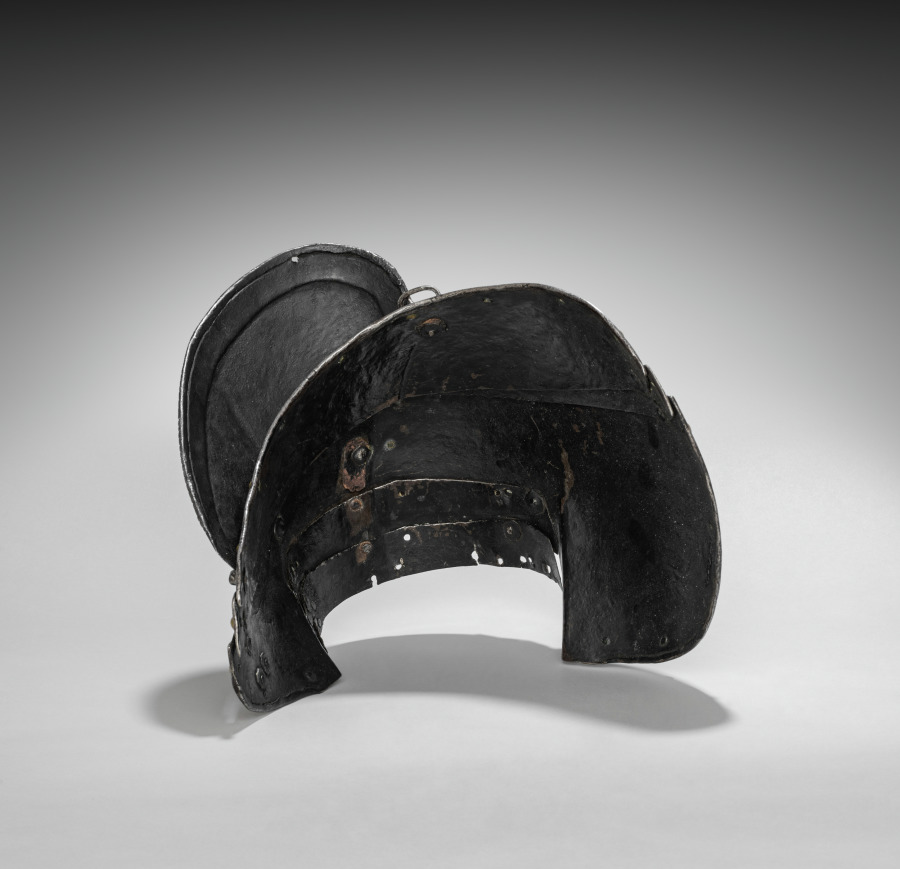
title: Pauldron (proper right) and Gardbrace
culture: South Germany, 16th century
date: c. 1560–1580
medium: steel, leather straps, brass rivets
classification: Arms and Armor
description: This armor was developed for the joust--a sporting combat between two mounted contestants. Although all of the elements of this armor date from the same period, they are not all from the same suit. This armor is thus called "composed." It also shows the asymmetry of jousting armor. The participants rode along a wall-like barrier known as a "tilt" with their left sides facing one another. Consequently, armor on that side of the body had to be thicker. Note the large plate (grandguard) over the left shoulder for extra protection. Also, the breathing holes in the helmet were placed on the right side (farthest from an opponent's lance) to avoid injuries from splinters. The bracket attached to the right breastplate is called the lance-rest, a shock-absorbing support designed to accommodate the lance when "couched" under the right armpit.